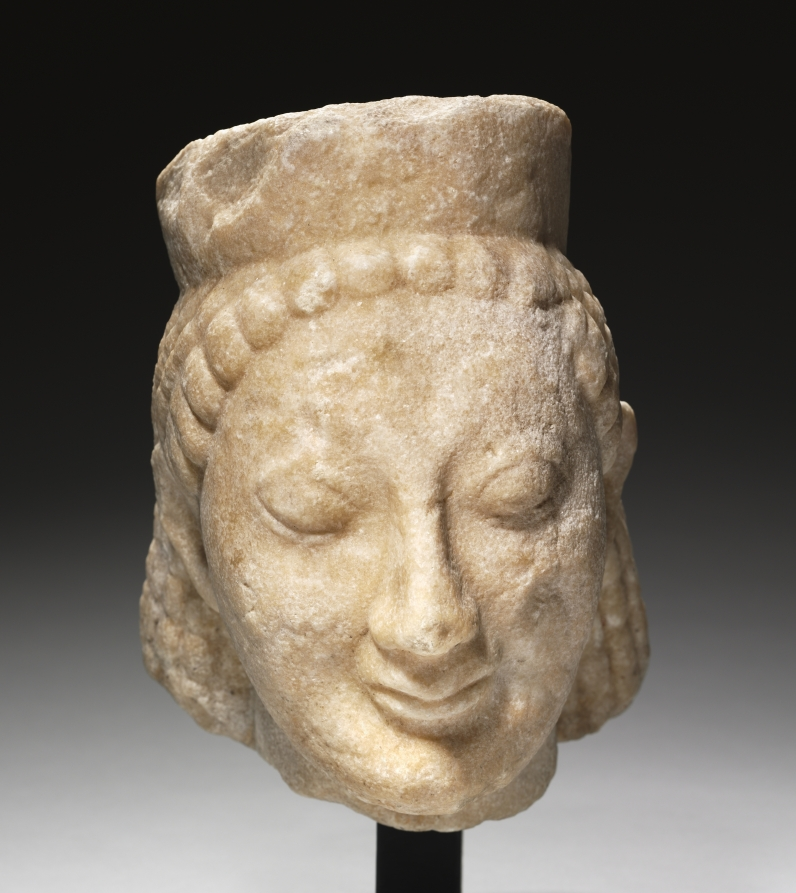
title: Head of a Sphinx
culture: Greece, Archaic period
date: 540–520 BCE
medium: marble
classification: Sculpture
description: This female head once belonged to a sphinx, a mythological hybrid creature with the head of a woman and body of a winged lion. Her short cylindrical crown, known as a polos, helps to identify her as a sphinx, as does the slope of her hair and neck, which once continued onto a feline body. Also common in ancient Egyptian and Near Eastern art (though more often in male form), the sphinx is best known in Greek mythology for devouring passersby who could not answer her riddle outside the Boiotian city of Thebes. Stone sphinxes like this one served as both votive offerings and grave monuments in Archaic Greece.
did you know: Greek sphinxes were often placed on top of columns or grave stelai as guardian figures.